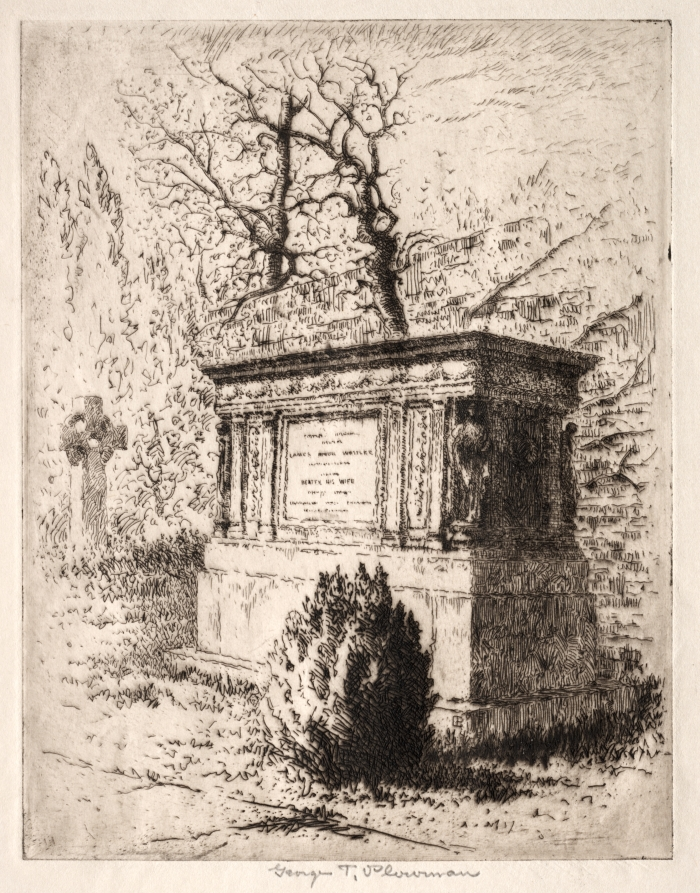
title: Whistler's Tomb, Chiswick, London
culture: America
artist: George Taylor Plowman (American, 1869–1932)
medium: etching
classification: Print